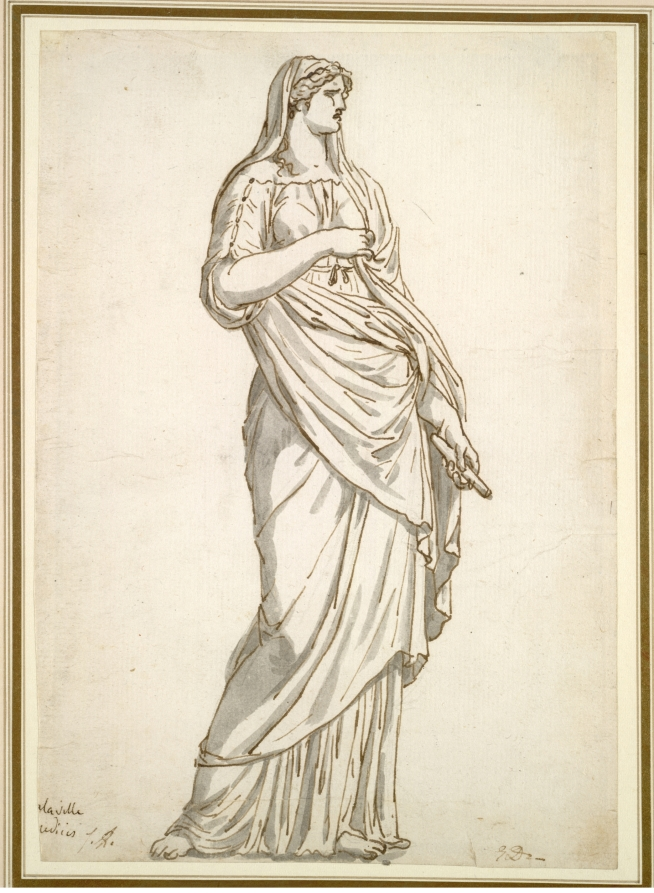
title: Study of the Sabine Statue from the Villa Medici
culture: France, 18th century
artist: Jacques-Louis David (French, 1748–1825)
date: c. 1775–1780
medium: pen and brown ink and brush and gray wash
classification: Drawing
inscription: by artist, lower left, in brown ink: ala villa / medicis; by Jules David, lower left, in brown ink: J. D. [Lugt 1437]; by Eugène David, lower right, in brown ink: E D _ [Lugt 839]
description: This drawing depicts a classical sculpture (see photo) said to represent a Sabine (the Sabines were a village people who resided northeast of ancient Rome). David saw the statue at Rome's Villa Medici, a fact he noted by inscribing the location at the lower left corner of this study. The artist made the sketch early in his career, during his 1775-80 stay in Italy as winner of the coveted Rome Prize scholarship. This and the many other drawings and tracings that David made after ancient sculpture and vases in Italy helped him later become the leader of neoclassical painting.